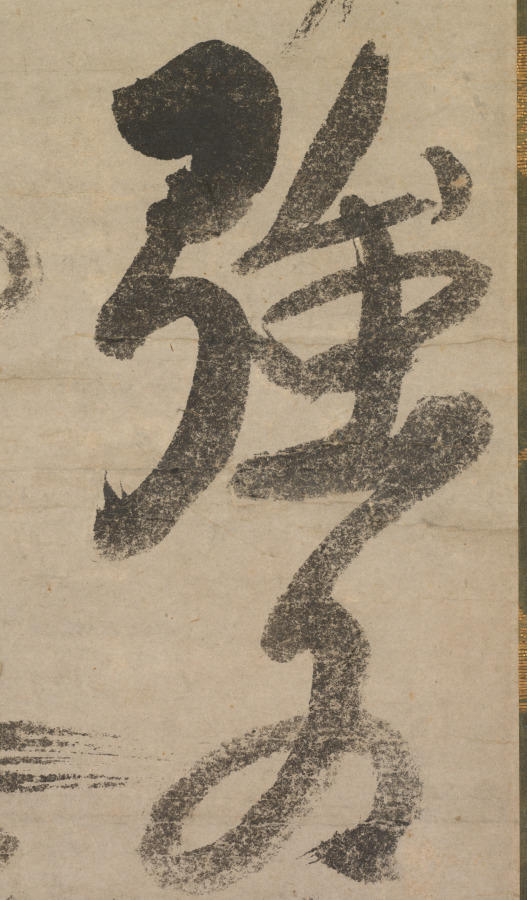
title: Reflections of Priest Foyen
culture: Japan, Muromachi period (1392–1573)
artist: Ikkyū Sōjun (Japanese, 1394–1481)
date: 1400s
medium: hanging scroll, ink on paper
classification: Painting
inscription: signed: "Kido nanasei son, Ikkyūshi Sōjun sho (Written by Ikkyū Sōjun, the seventh generation of Kido)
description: Left by his mother at a small Zen temple in Kyoto at the age of six, Ikkyu later drew on his early studies and experiences for his writings, which focused on his keen interest in the Chinese classics. Poetry in particular was a favorite subject and images from classical poetry or passages from favorite poems or commentaries frequently provided Ikkyu with the core ideas for his own work. A rare example of his calligraphy, this narrow scroll contains a verse in eight phrases, each comprising four characters. The whole verse is organized in three towering lines of brusque, emphatic calligraphy augmented by Ikkyu's signature-the two lines of running script in the lower left corner. The text refers to a passage included in the Chronicle of the Zen Sect that contains a cautionary reminder attributed to the legendary Chinese monk Foyen Qingyuan (1067-1120), long revered in Japan. The initial phrase begins: "Life is a mirage."